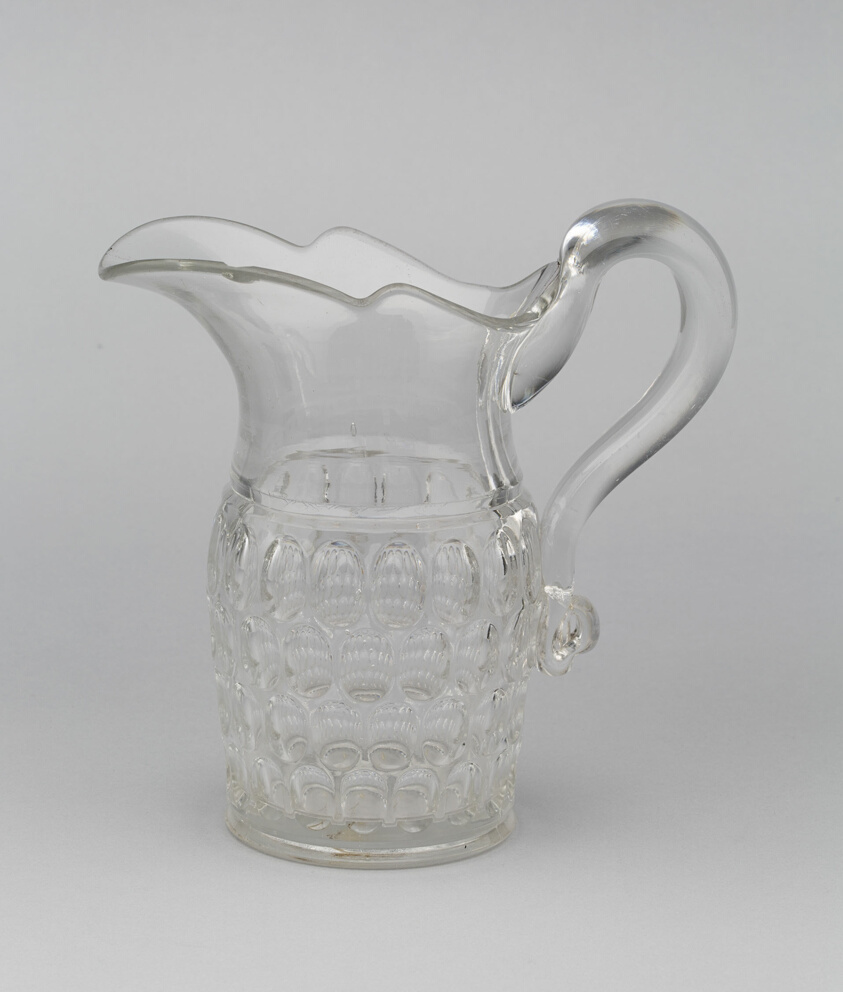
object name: Glass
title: Pitcher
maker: Artist unknown (American, 19th century)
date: c. 1850–70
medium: Pressed glass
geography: United States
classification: pitcher (vessel); glass; american decorative arts; american arts; decorative arts